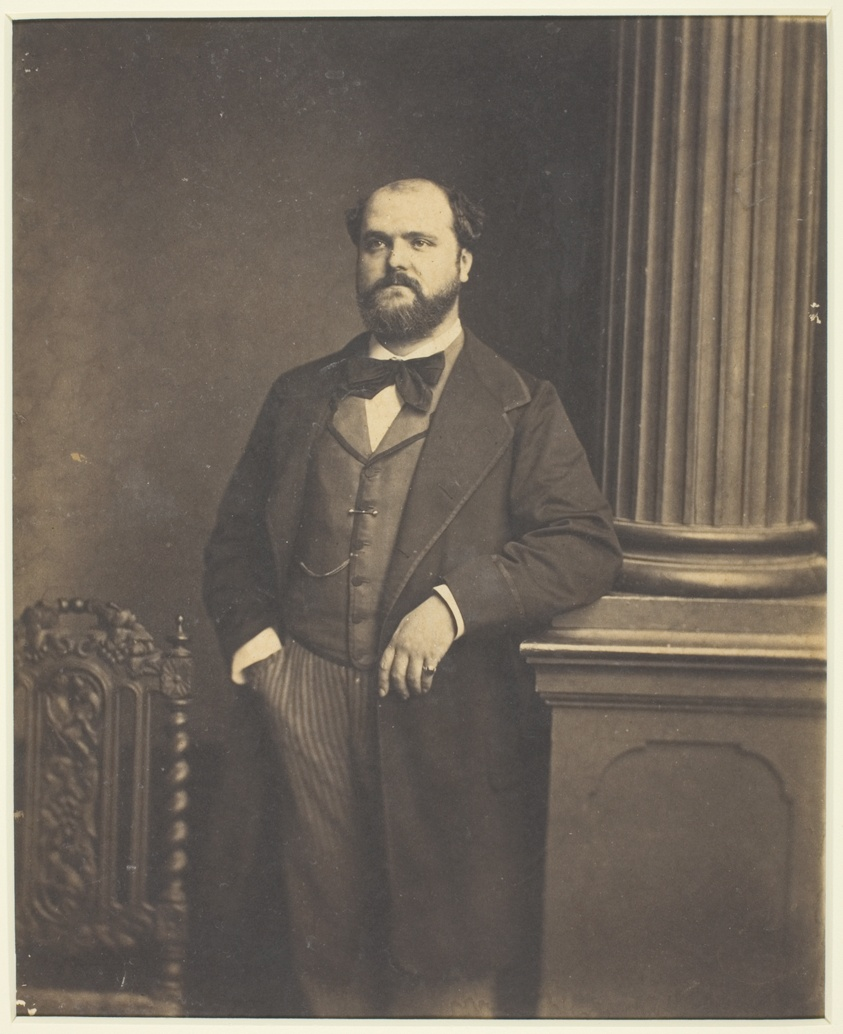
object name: Photograph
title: Untitled (Man Standing, en Face)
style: 19th century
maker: Antoine Samuel Adam-Salomon (French, 1811–1881)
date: 1855/1869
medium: Salted paper print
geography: France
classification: salted paper print; photographic process; photography; photograph